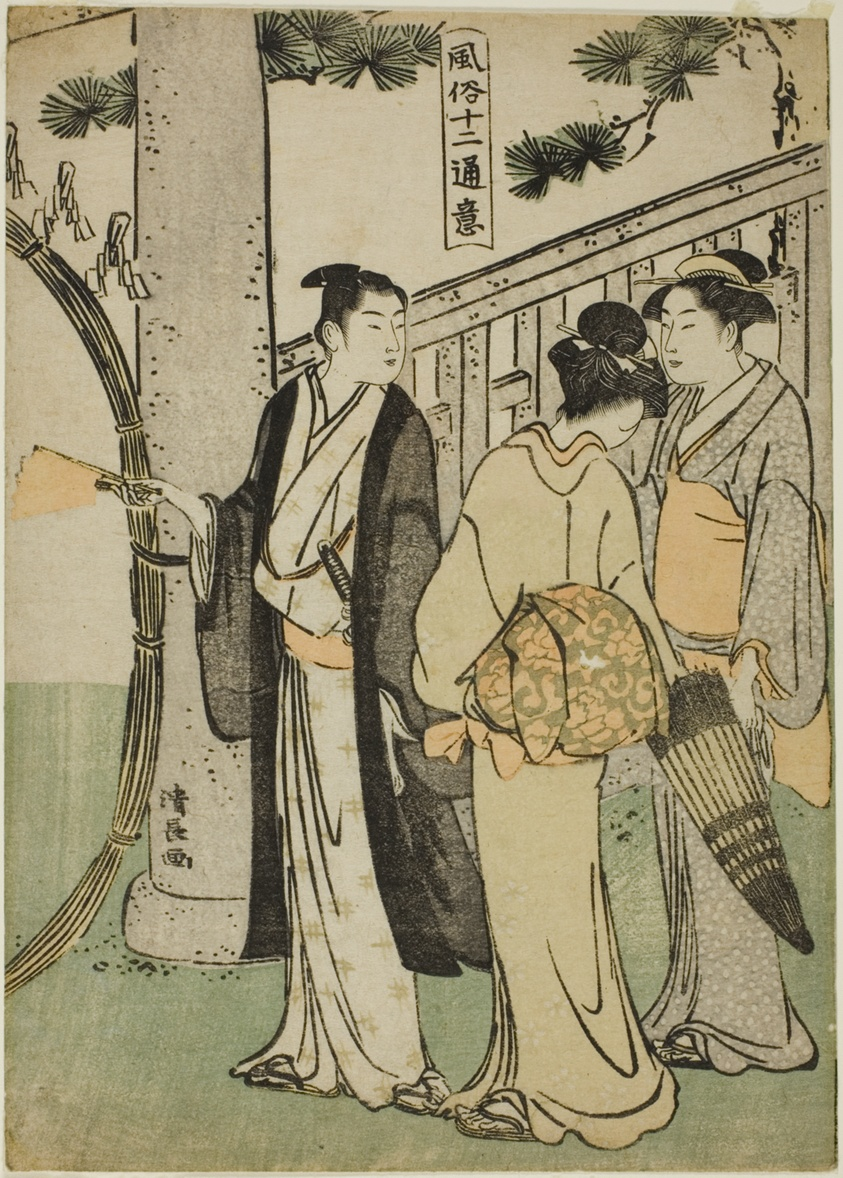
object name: Print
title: A visit to a shrine, from the series "Twelve Scenes of Popular Customs (Fuzoku juni tsui)"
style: Japanese (culture or style)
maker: Torii Kiyonaga (Japanese, 1752-1815)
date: c. 1786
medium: Color woodblock print; koban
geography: Japan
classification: woodblock print; print; asian art